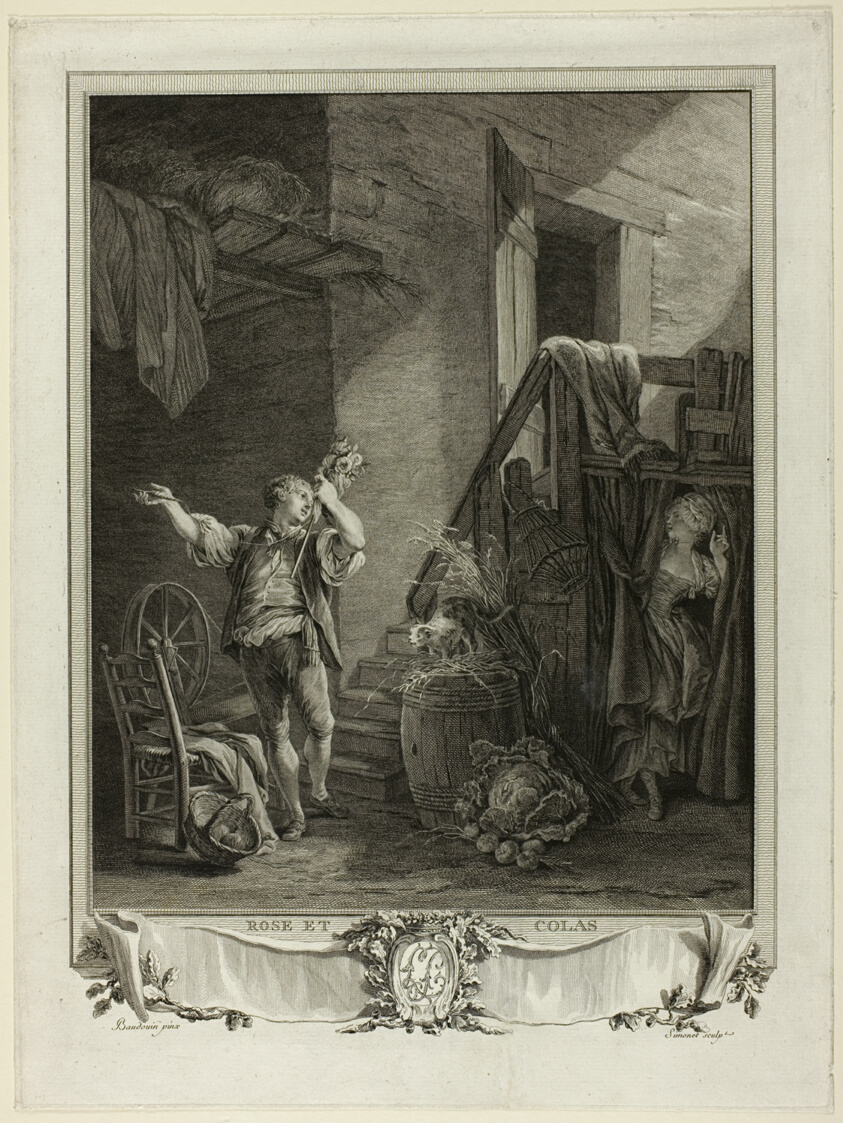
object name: Print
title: Rose and Colas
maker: Jean Baptiste Blaise Simonet (French, 1742-1813); after Pierre Antoine Baudouin (French, 1723-1769)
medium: Etching on paper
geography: France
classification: etching; print; prints and drawing